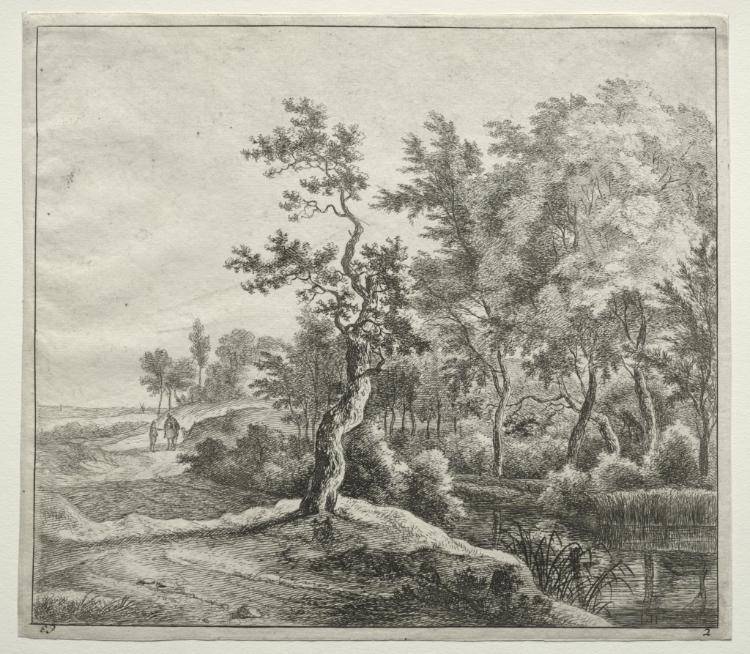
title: The Serpentine Road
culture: Netherlands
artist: Jan Hackaert (Dutch, 1629–c. 1700)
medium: etching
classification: Print